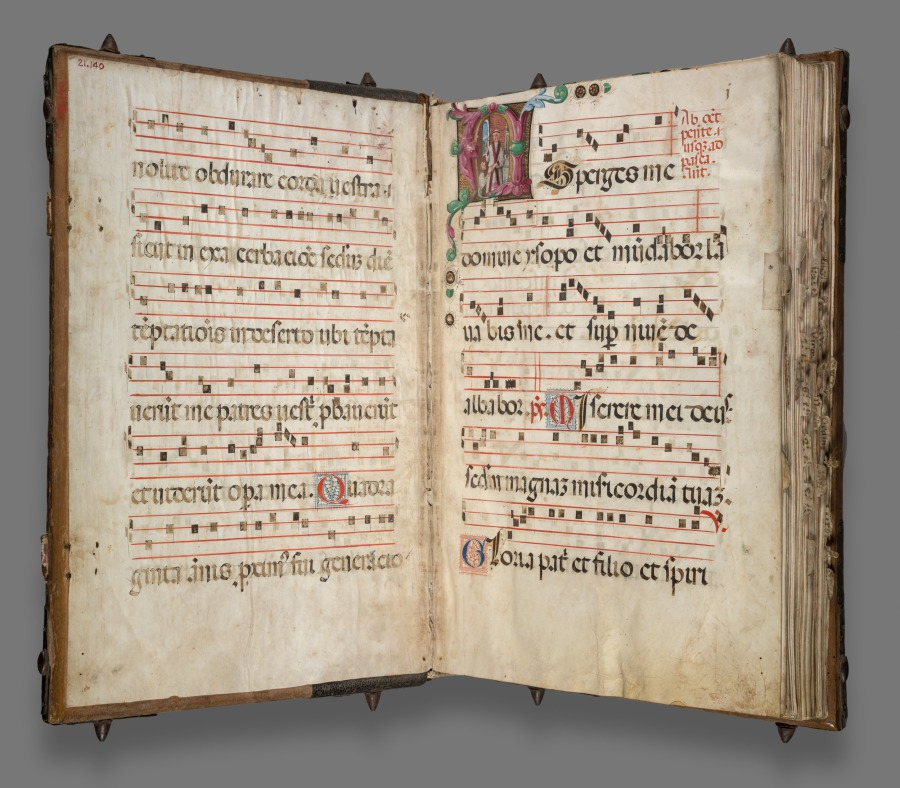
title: Gradual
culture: Italy, Verona(?)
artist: circle of Girolamo dai Libri (Italian, 1474–1555)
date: c. 1520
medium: ink, tempera, and gold on parchment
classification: Manuscript